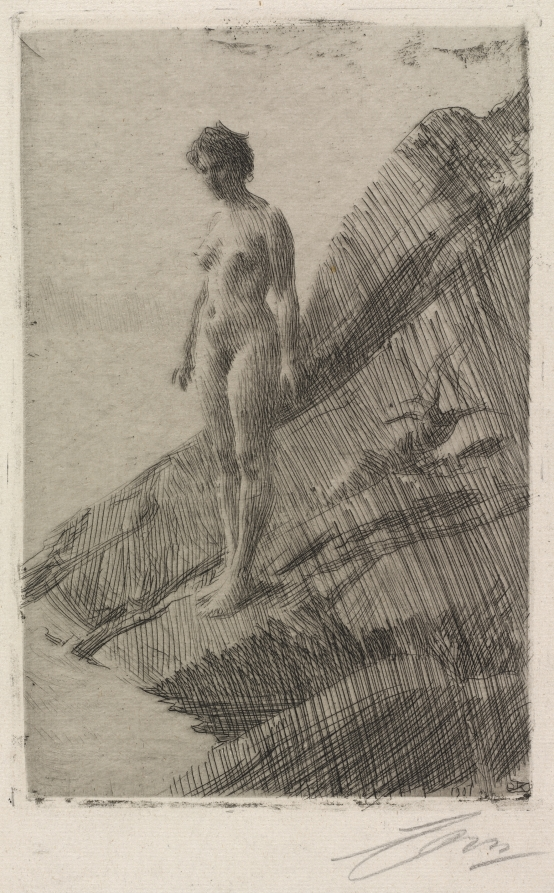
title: Edö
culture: Sweden, 20th century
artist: Anders Zorn (Swedish, 1860–1920)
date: 1907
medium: etching and drypoint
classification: Print